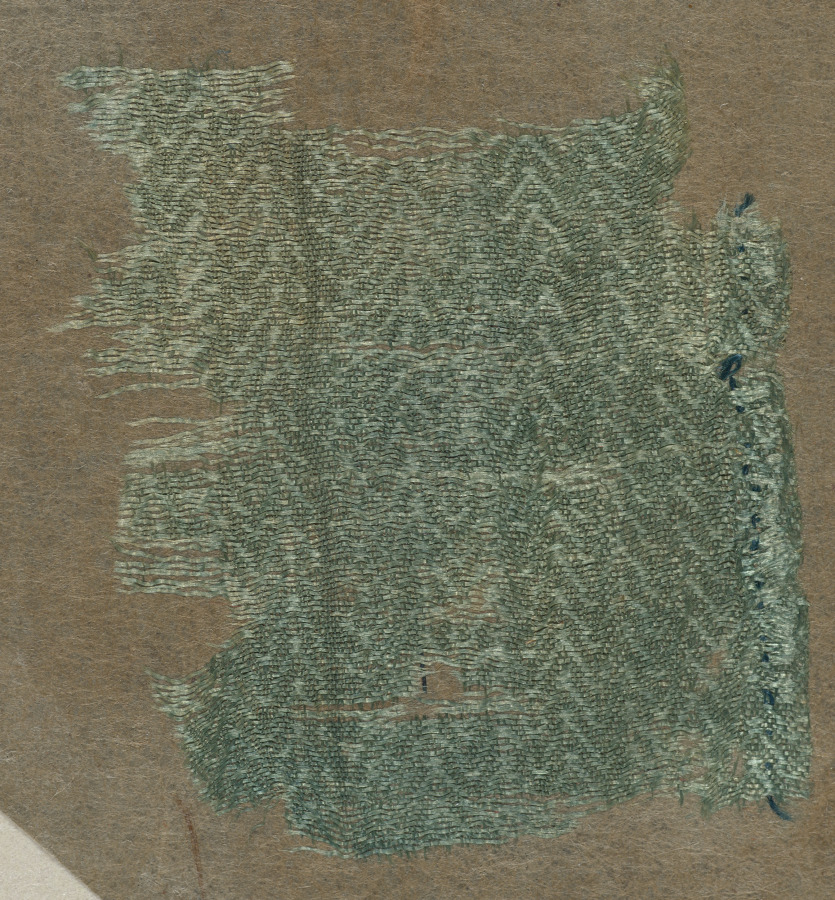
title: Fragment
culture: China, Tang dynasty (618-907)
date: 700s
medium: tabby ground and twill pattern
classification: Textile